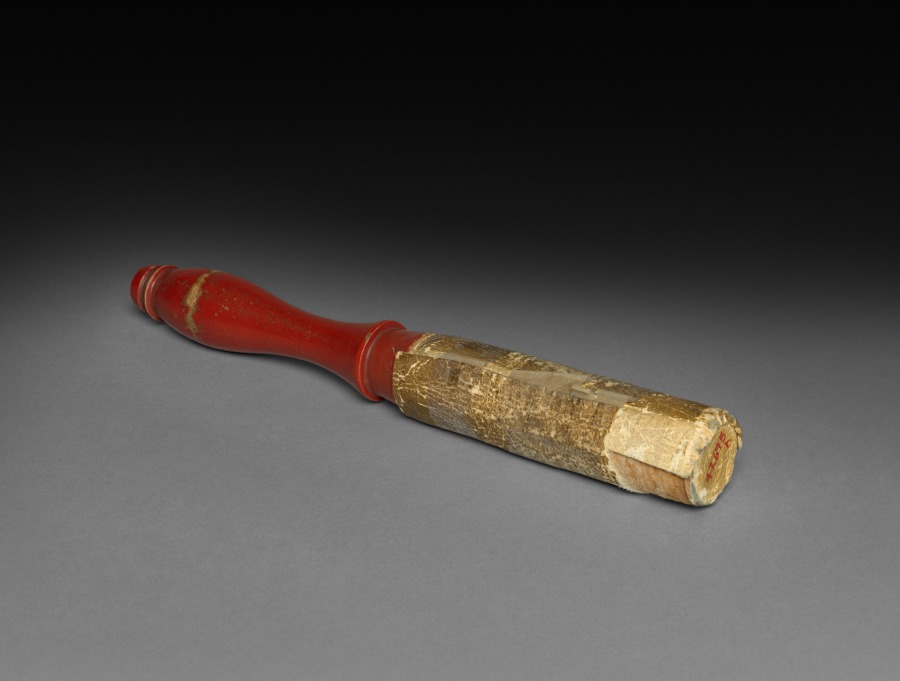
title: Gong Beater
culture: Japan, Edo period (1615–1868)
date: early to mid-1800s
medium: bronze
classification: Metalwork